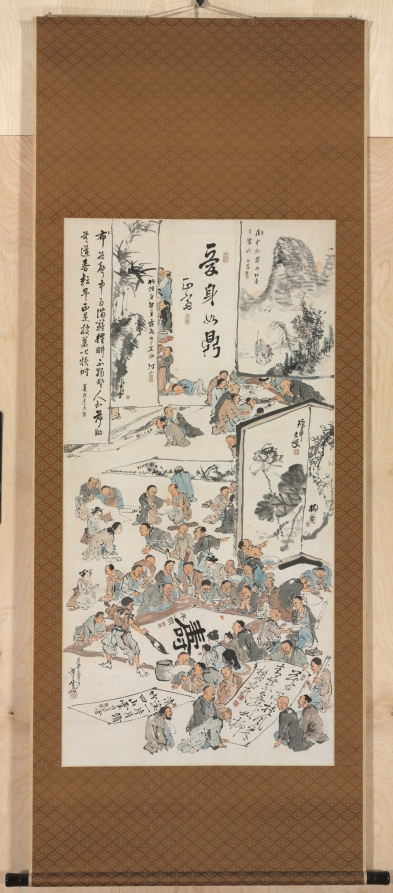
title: Painting Party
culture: Japan, Meiji period (1868–1912)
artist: Kawanabe Kyōsai (Japanese, 1831–1889)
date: 1880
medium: hanging scroll; ink and color on paper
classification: Painting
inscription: Artist's signature and seal at lower left.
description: In this collaborative painting, artists create works in response to patrons’ requests. Kawanabe Kyōsai painted the figures and outlines of the screens and scrolls, and 10 bunjin completed them. Each calligraphy and painting has a signature. Physician and calligrapher Nakane Hanrei (中根半嶺) (1831–1914) wrote “longevity” (壽) with an enormous ink-filled brush. Painter Fukushima Ryūho (福島柳圃) (1820–1889) did the plum on the folding screen, while Matsuoka Kansui (松岡環翠) (1818–1887) did the lotus; the two seem to be standing nearby, pointing others toward their accomplishment.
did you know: One participant in this gathering appears to be taking a nap.